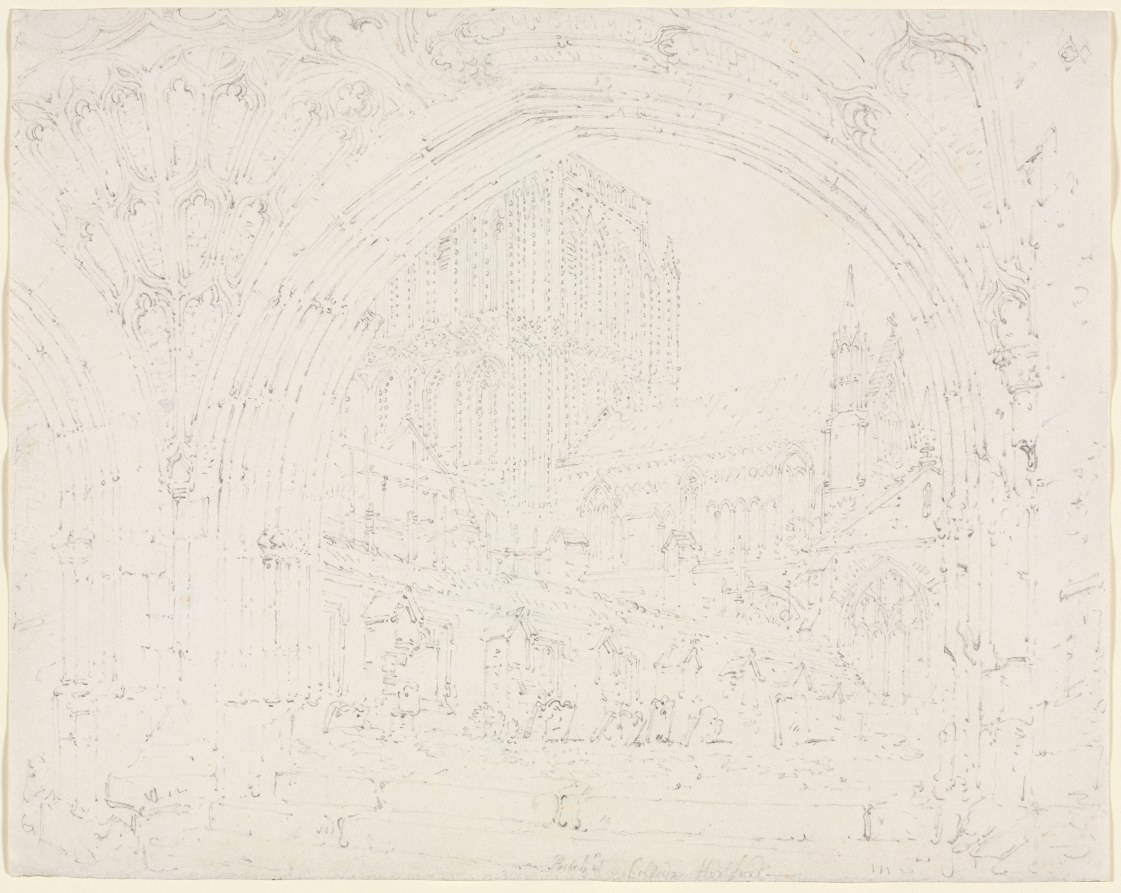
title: Hereford Cathedral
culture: England, 19th century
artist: Joseph Mallord William Turner (British, 1775–1851)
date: c. 1793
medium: graphite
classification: Drawing